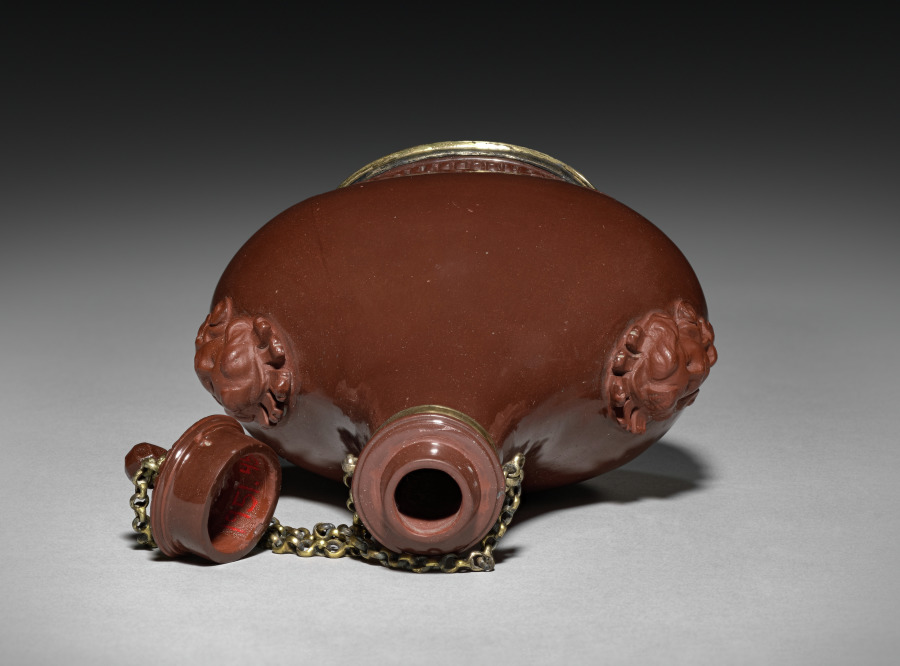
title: Pilgrim Bottle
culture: Germany, Meissen, 18th century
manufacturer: Meissen Porcelain Factory (German, est. c. 1710)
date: c. 1715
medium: polished red stoneware, silver-gilt mounts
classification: Ceramic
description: Throughout the early 1700s porcelain was imported to Europe from China and Japan, until the correct formula to produce it was developed by Johann Friedrich Böttger and a collaborator, which led to the establishment of the Meissen factory in 1710. Red stoneware inspired by Chinese Yixing ware and white porcelain were produced in Meissen under Böttger. Its fine red stoneware was so hard that it could be polished on a lapidary’s wheel—as was the body of this bottle.